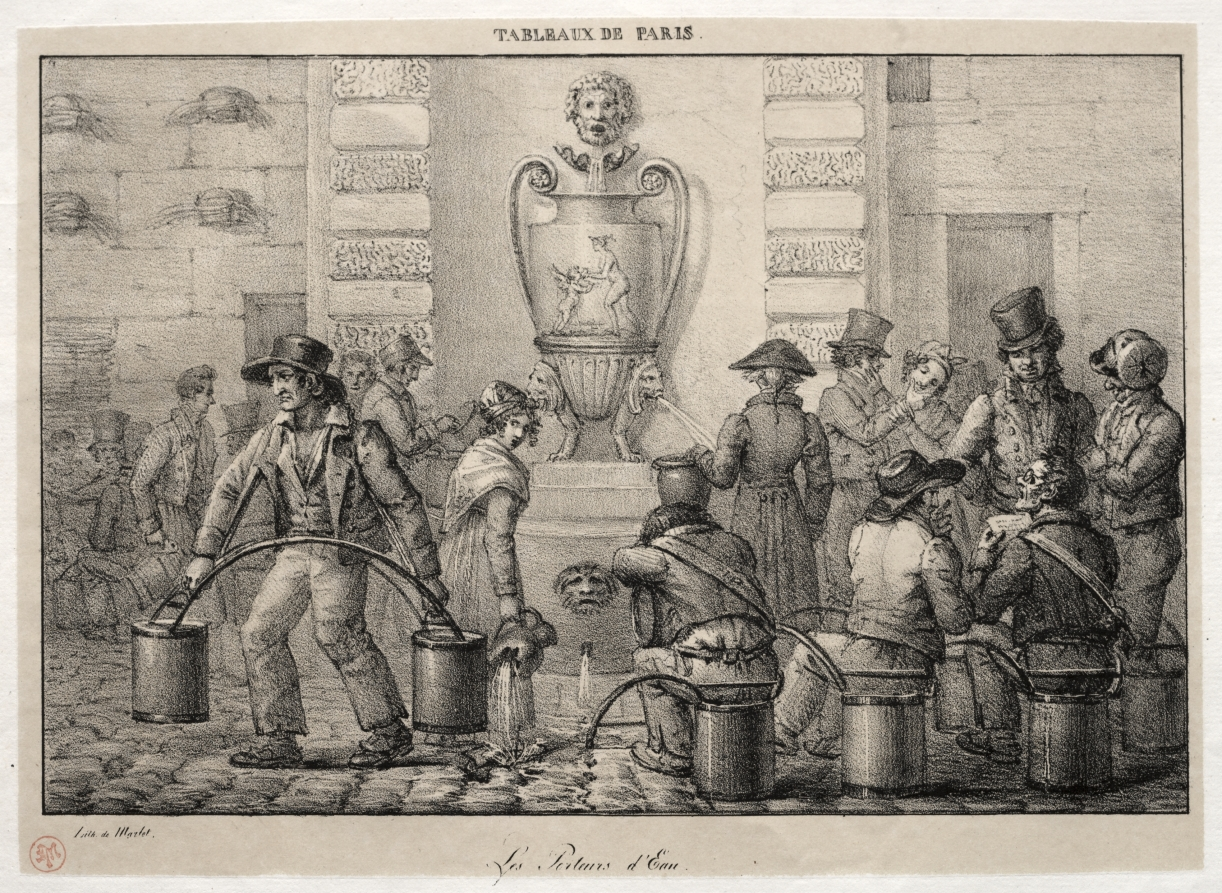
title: The Water Carriers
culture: France, 19th century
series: Scenes of Paris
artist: Jean Henri Marlet (French, 1770–1847)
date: 1820s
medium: lithograph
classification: Print